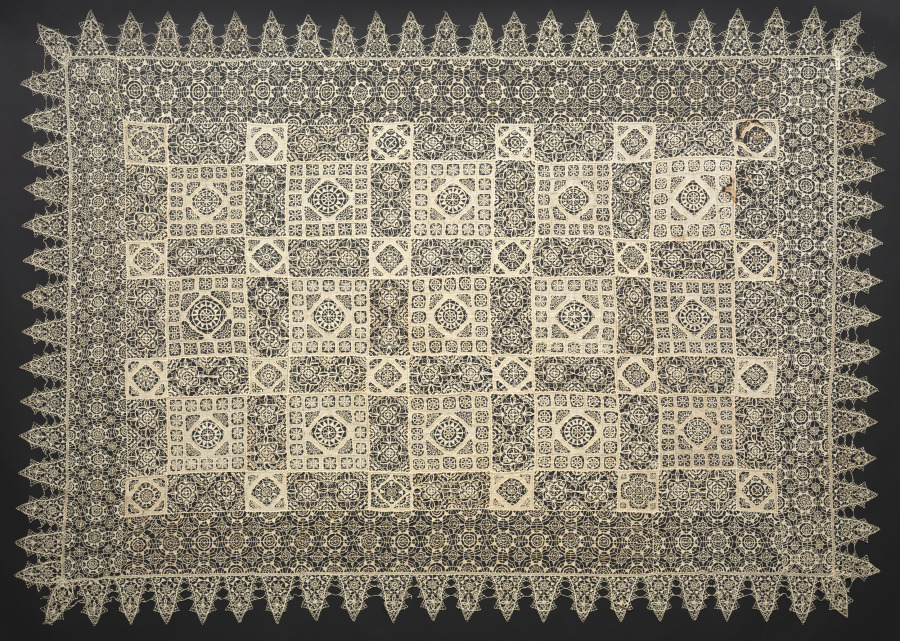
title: Lace Cloth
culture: Italy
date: 1560–1600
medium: Linen; needle lace (cutwork and reticella)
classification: Lace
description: Consisting of more than 80 squares of cutwork (a cut and embellished linen ground) and rectangles of reticella (needle lace), this luxurious cover could have been made by a single person or several people who divided the work. Close looking reveals that the cloth is made with threads of two very slightly different colors: bleached and unbleached linen. Together the sections resemble snowflakes, which are of similar shape and size but vary subtly from one another. The perplexing dark stitches in the upper left corner do not repair damage, and might be the maker’s signature.